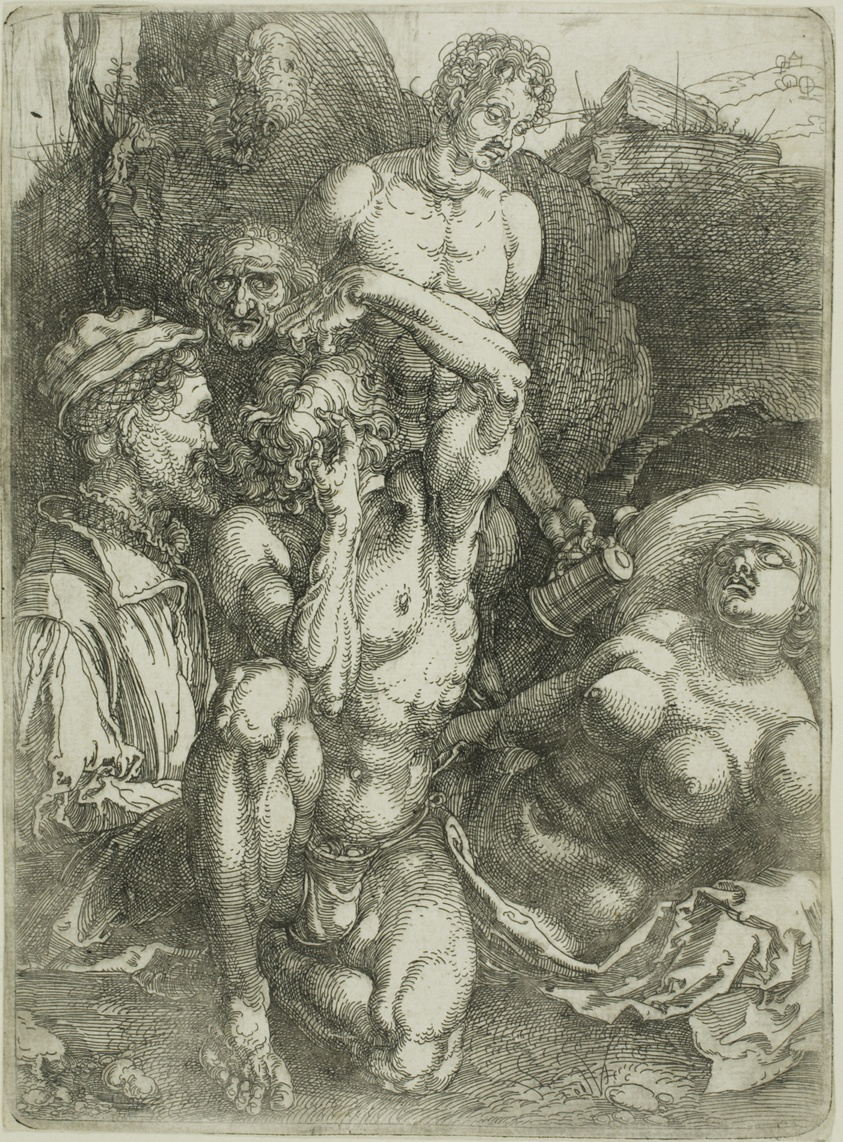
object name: Print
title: The Desperate Man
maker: Albrecht Dürer (German, 1471-1528)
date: 1515–16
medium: Etching in black on ivory laid paper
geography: Germany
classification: etching; print; prints and drawing; paper